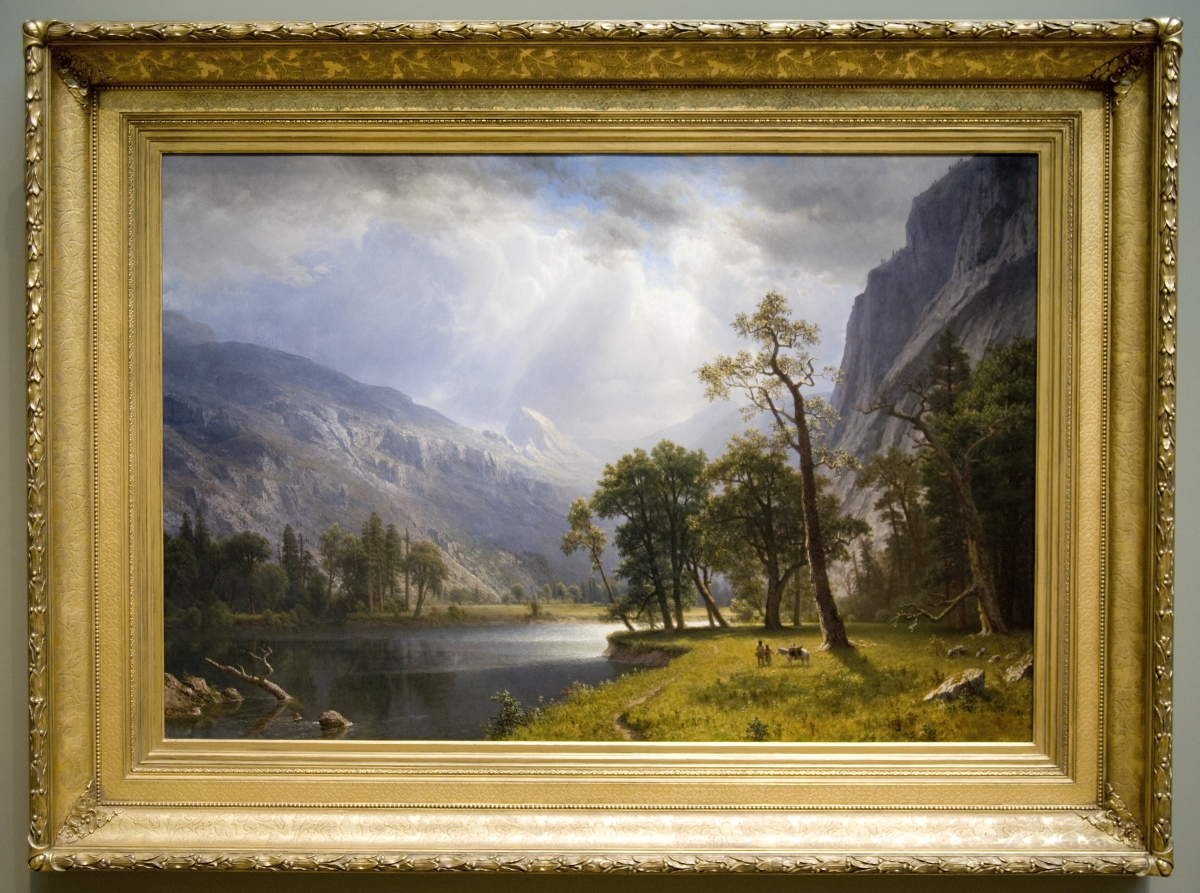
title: Mount Starr King, Yosemite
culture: America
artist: Albert Bierstadt (American, born Prussia [now Germany], 1830–1902)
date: 1866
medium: oil on canvas on panel-back stretcher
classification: Painting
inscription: signed lower right: ABierstadt. / 66 [AB in monogram]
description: During the summer of 1863, Bierstadt visited Yosemite Valley in California and made numerous sketches. Back in his New York studio, he used them to produce many majestic paintings, including this view of the distant granite peak Mount Starr King. Such scenes thrilled East Coast audiences and helped encourage early movements to safeguard natural wonders. In 1864, President Lincoln signed a bill preserving Yosemite as public property; it became a national park in 1890. Bierstadt included two Native Americans with a packhorse in his composition, and their presence references the fact that Indigenous peoples had inhabited or seasonally visited the region for millennia. Over time, various government and military agencies dispossessed them of these ancestral lands. Although no longer residents in the national park, descendants of the seven Indigenous nations with ties to Yosemite persevered to live in neighboring areas.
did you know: Highly successful, Bierstadt built a mansion and named it Malkasten, a German word meaning “paintbox.”